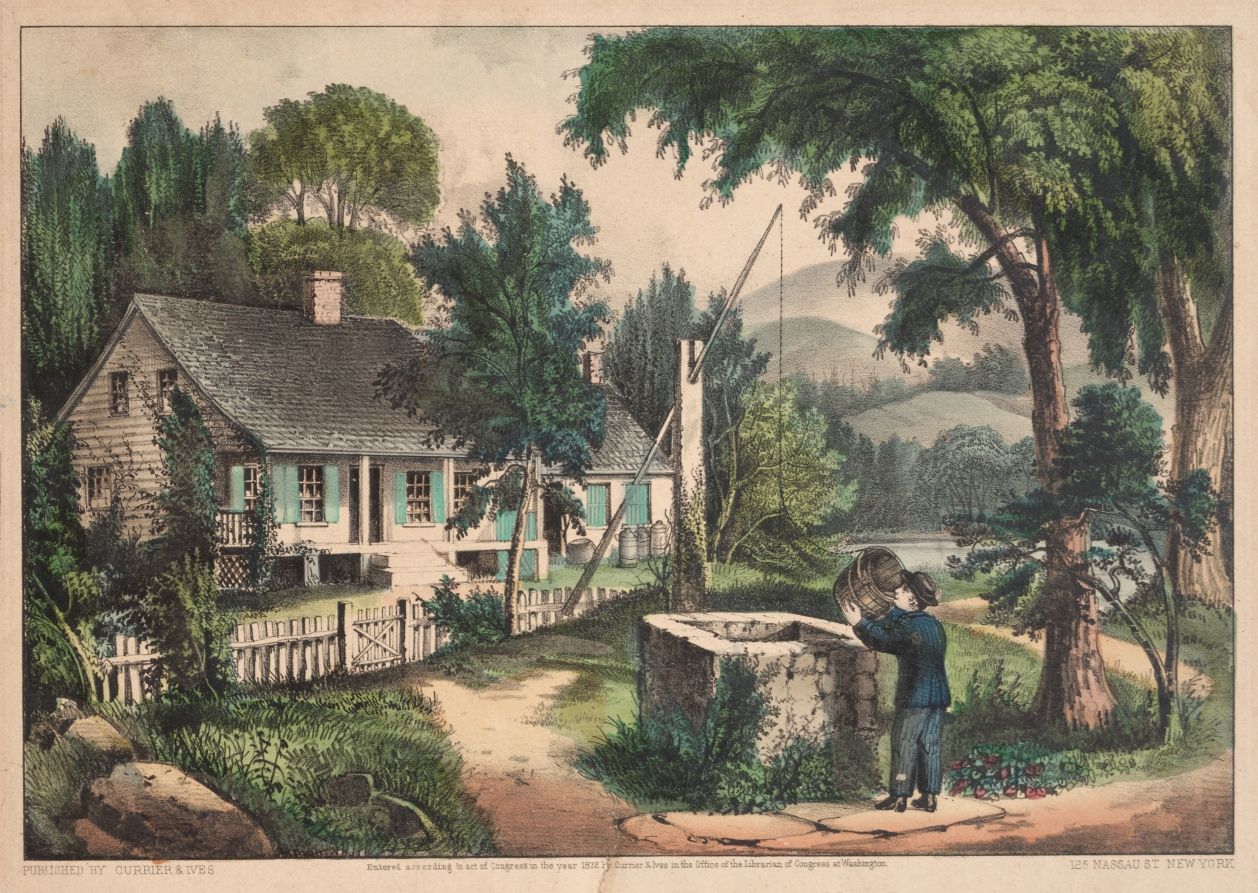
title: The Old Oaken Bucket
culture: America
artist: and James Merritt Ives (American, 1824–1895)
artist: Nathaniel Currier (American, 1813–1888)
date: c. 1857–72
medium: lithograph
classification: Print